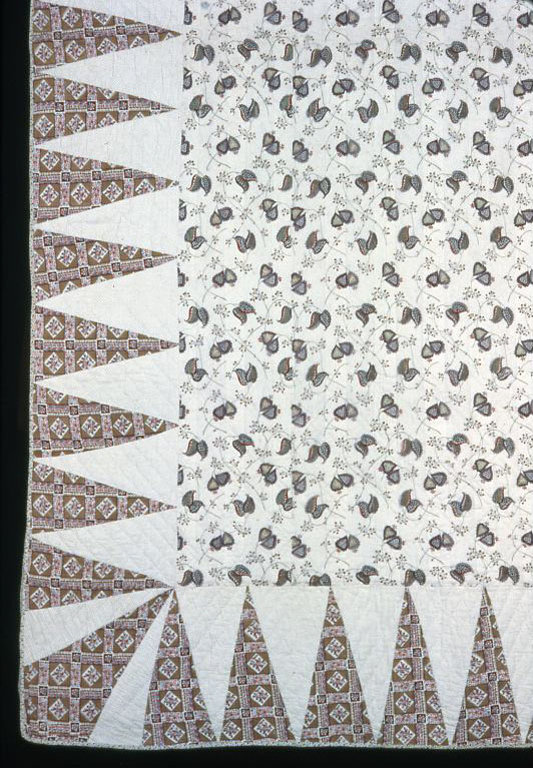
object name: Textile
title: Bedcover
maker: Lorinda Gilbert (English, active 1850s); England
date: 1850/1900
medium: Cotton, plain weave; roller printed; pieced; quilted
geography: England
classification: textile; needlework - quilt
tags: flowers, lattices